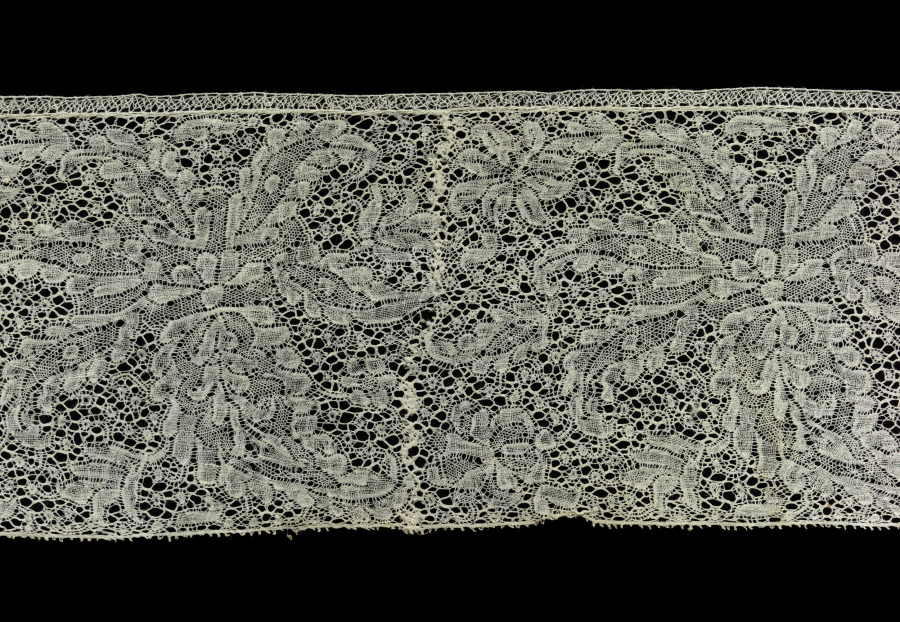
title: Lace Edging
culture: Belgium, Binche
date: 1600s–1700s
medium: Bobbin lace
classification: Lace